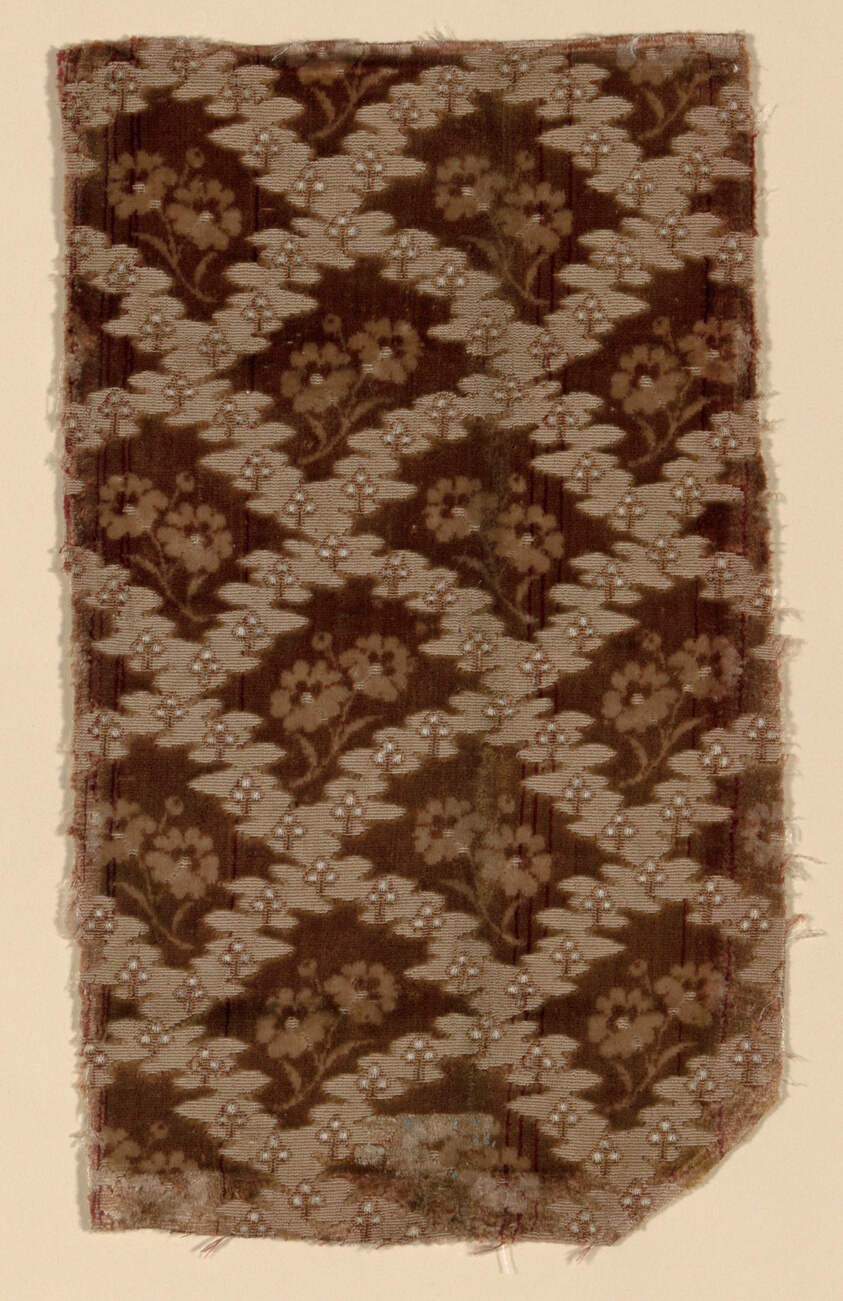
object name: Textile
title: Fragment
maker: France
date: 1750/75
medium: Silk, cut, uncut, and voided velvet against satin weave foundation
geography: France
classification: textile; weaving - velvet